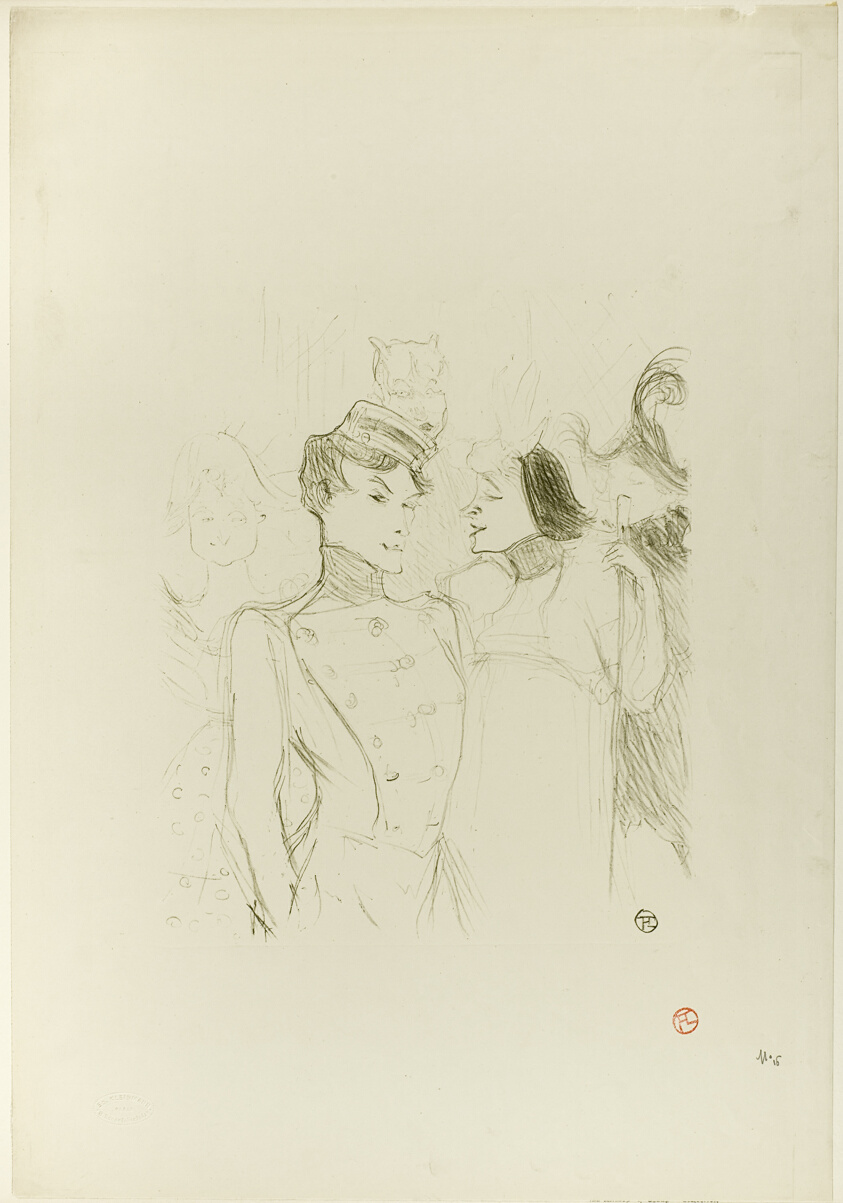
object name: Print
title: Lender and Lavallière in a Revue at the Variétés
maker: Henri de Toulouse-Lautrec (French, 1864-1901)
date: 1895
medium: Color lithograph on cream wove paper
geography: France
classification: lithograph; print; prints and drawing